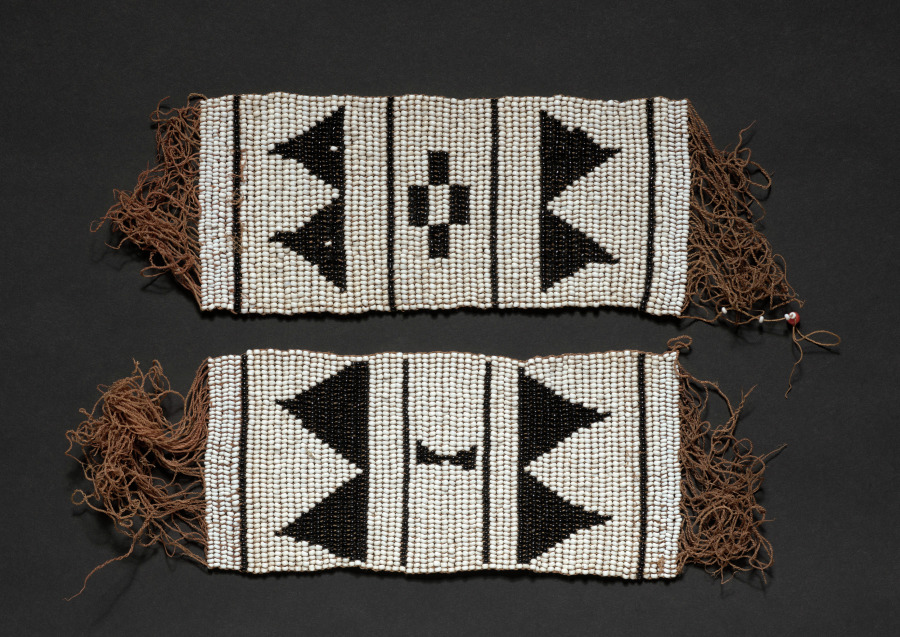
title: Royal ceremonial beadwork: anklet (izitsaba)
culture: Africa, Southern Africa, South Africa, Southeast Cape Region, Unknown female Xhosa-style maker(s)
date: 1800s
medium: Glass beads and sinew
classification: Mixed Media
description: Elite Xhosa women once wore beaded garments like this on festive occasions. Made almost completely from imported Venetian or Bohemian glass beads, they were overt status symbols. Imported beads functioned as money for the Xhosa between about 1770 and 1829. These garments’ female maker carefully selected beads of the highest quality, uniform in color, shape, and size. Made in the same shape as the pendant, a swallowtail-shaped apron (CMA 2010.206) worn under the skirt completed the ensemble.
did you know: The beads to make an ensemble like this cost several cattle in the early 1800s, an amount most couldn't afford.